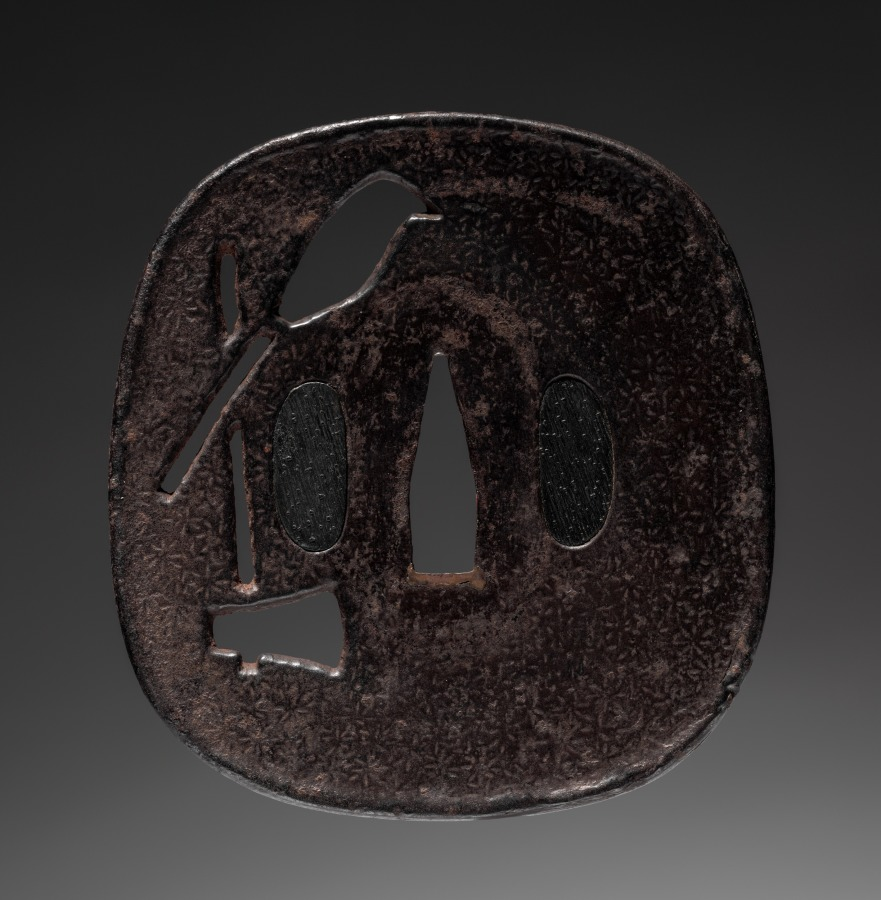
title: Sword Guard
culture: Japan, Edo period (1615–1868)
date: late 1700s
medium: iron (Myochin type)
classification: Arms and Armor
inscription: signed "Naomitsu made."